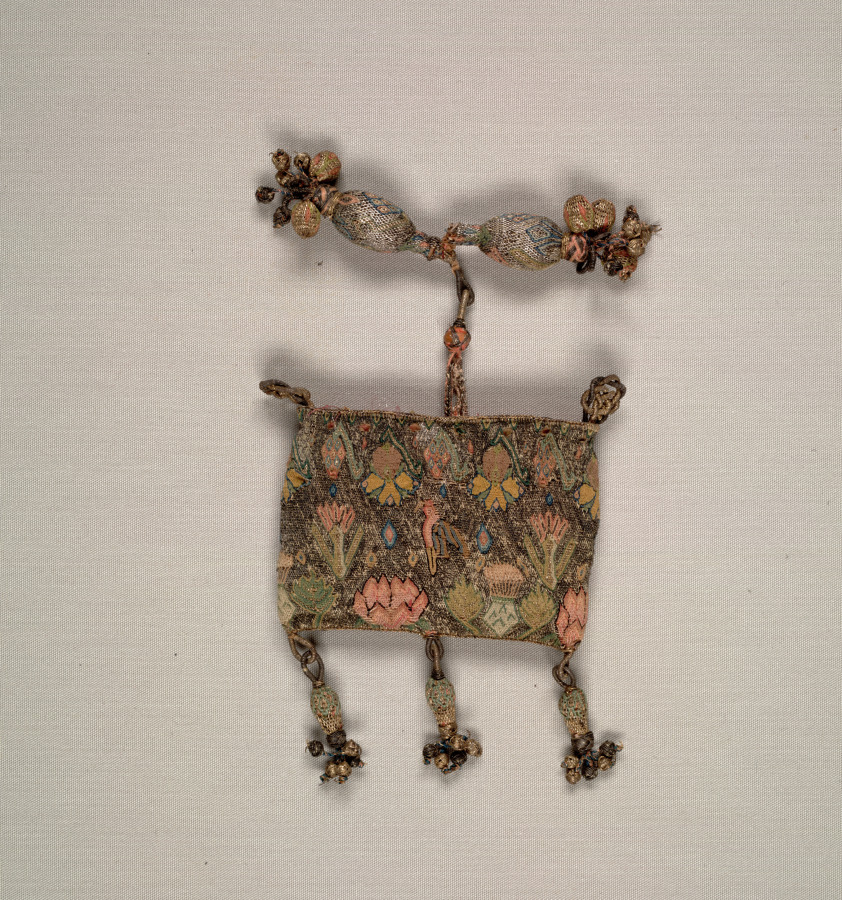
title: Purse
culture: England, early 17th century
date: early 1600s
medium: embroidery; silk and silver filé on linen ground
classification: Embroidery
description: According to Elizabethan embroidery scholar Jacqui Carey, this purse and its trimmings are typical of a ‘sweet bag’, though it is missing its handle and its drawstring is damaged. The term ‘sweet bag’ was popularized in George Wingfield Digby’s 1963 publication on Elizabethan embroidery; Digby used the term to describe small English purses dating from the 1500s and 1600s. The body of the purse is not the usual embroidered linen. Instead, it is a form of tubular warp-wrapping, a larger version of the structure and design found on tassels typical of the period. The body of the purse is made from a spiraling weft wrapped with multiple warp threads. It is assumed that it was made over a cylindrical form that was removed when the work was complete. The motifs are created by shifting the colored threads. Black silk warp threads that have since disintegrated expose the spiraling weft.